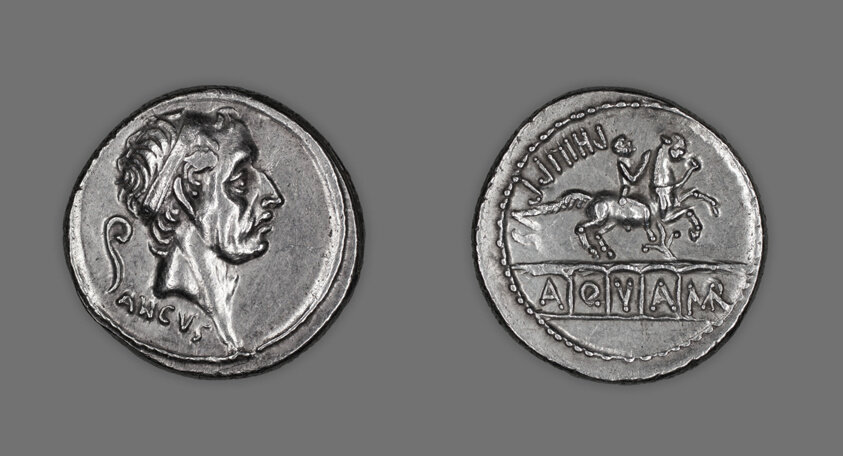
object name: Coin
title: Denarius (Coin) Portraying King Ancus Marcius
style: republic period, roman (ancient, style or period), ancient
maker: Roman; minted in Rome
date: 56 BCE, issued by L. Marcius Philippus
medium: Silver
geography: Roman Empire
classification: coin; ancient art